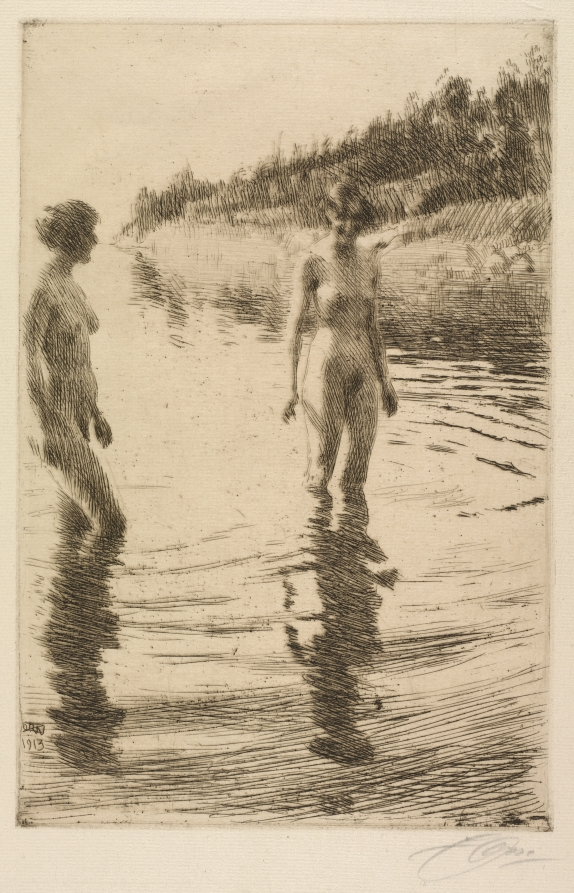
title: Shallow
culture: Sweden, 20th century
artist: Anders Zorn (Swedish, 1860–1920)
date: 1913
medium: etching and drypoint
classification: Print